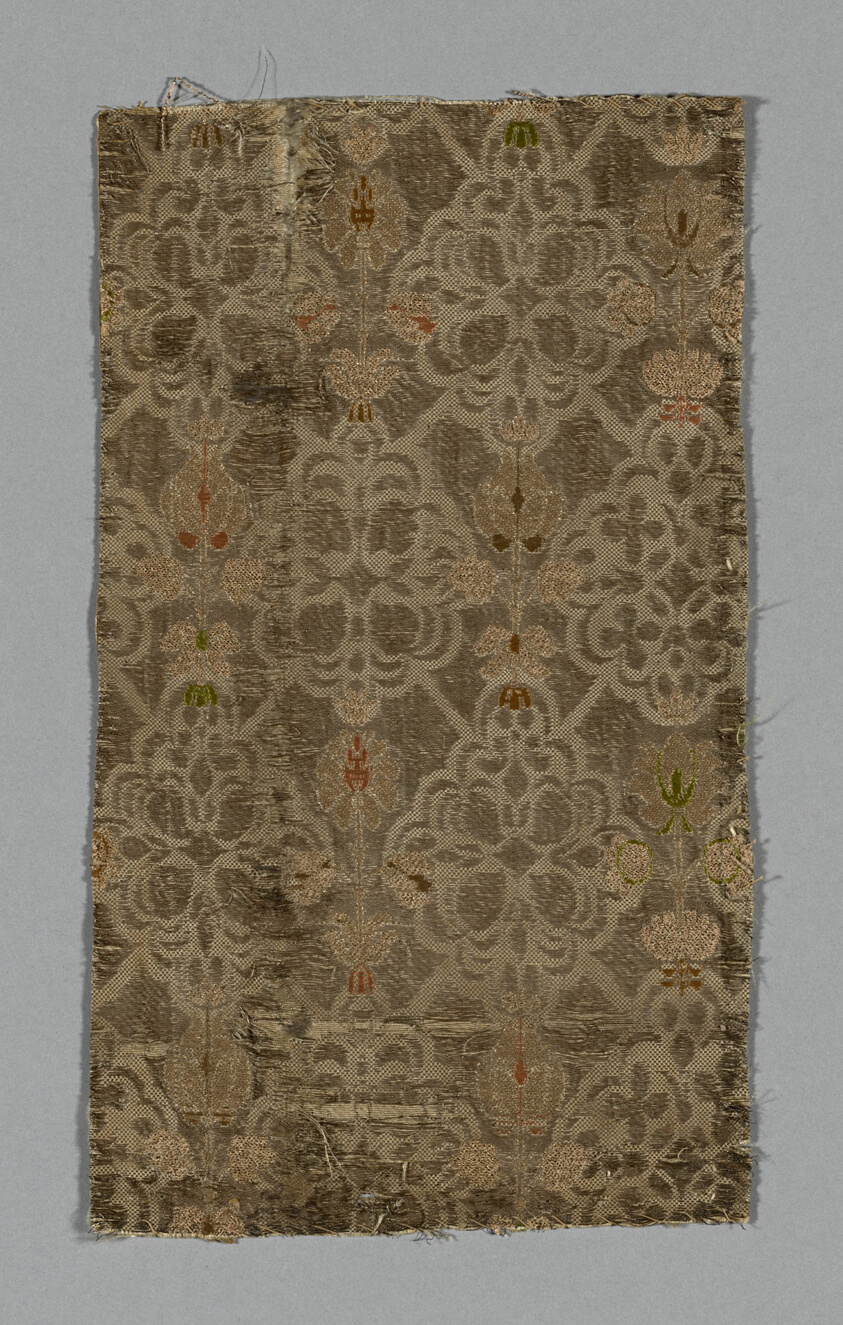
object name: Textile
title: Fragment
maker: Spain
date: 17th century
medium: brocaded silk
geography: Spain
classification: textile; weaving